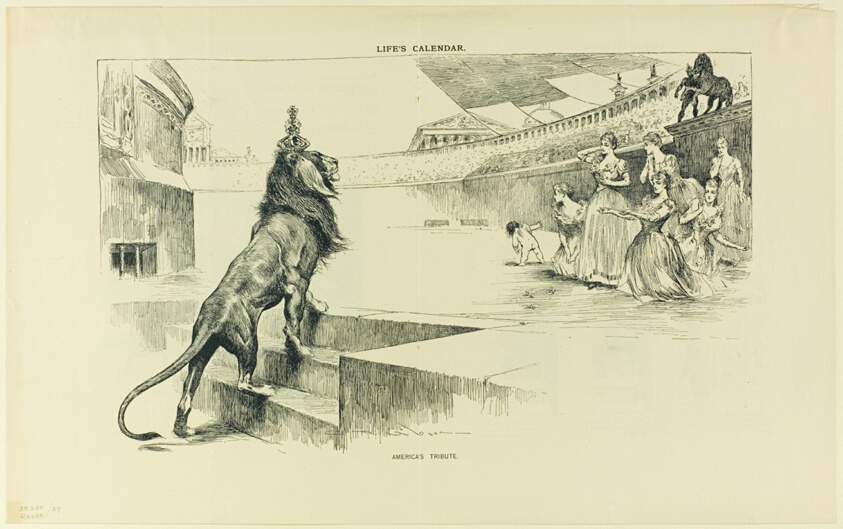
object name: Print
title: America's Tribute, from Life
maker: Charles Dana Gibson (American, 1867-1944)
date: 1891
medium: Lithograph on newsprint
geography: United States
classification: print; prints and drawing